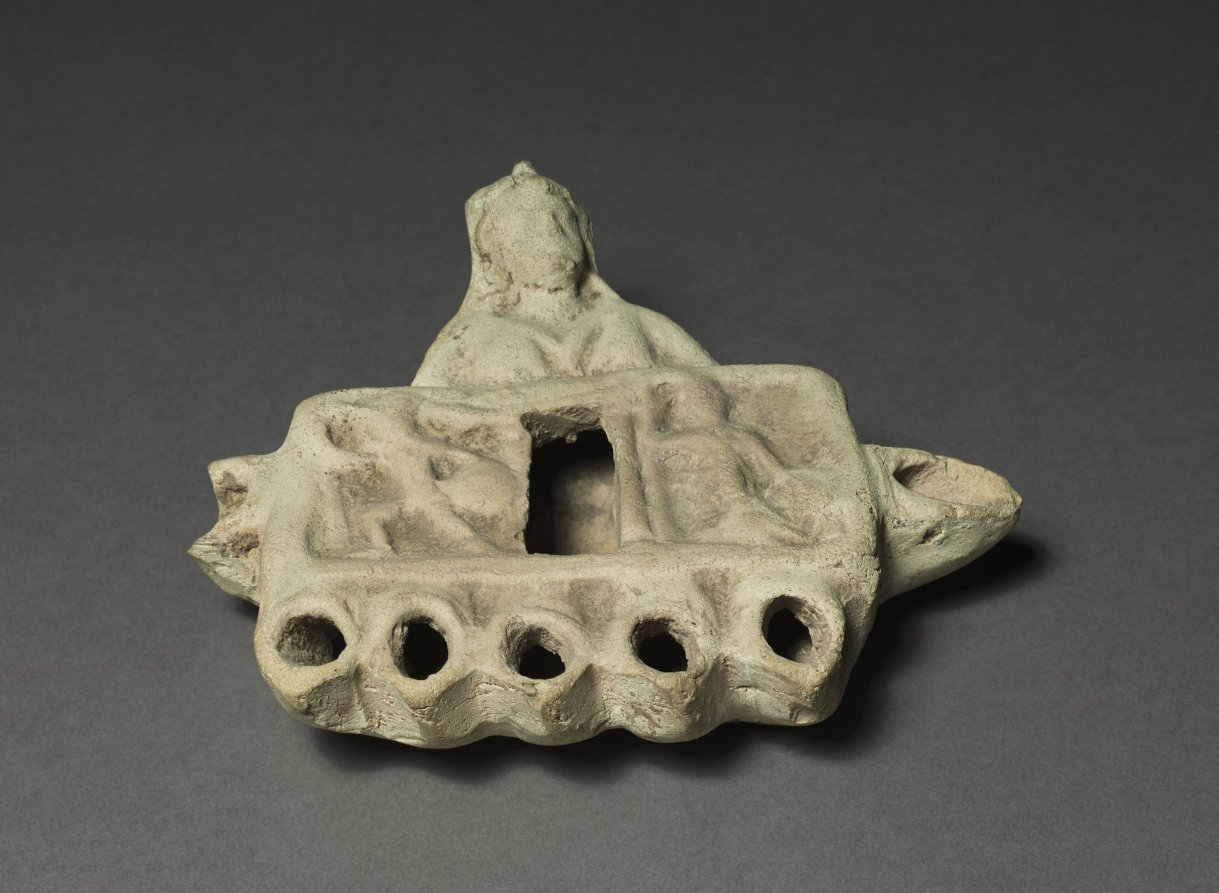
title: Five Burner Lamp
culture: Parthian Empire (247 BCE–224 CE)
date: 1–200 CE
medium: terracotta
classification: Ceramic